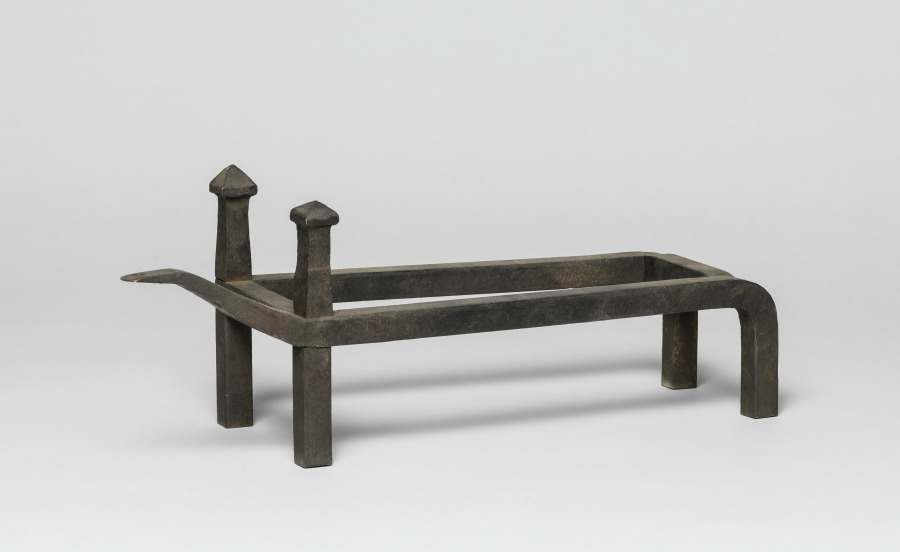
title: Andiron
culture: France, style of Louis XVI, 18th Century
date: c. 1770–1790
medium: marble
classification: Furniture and woodwork